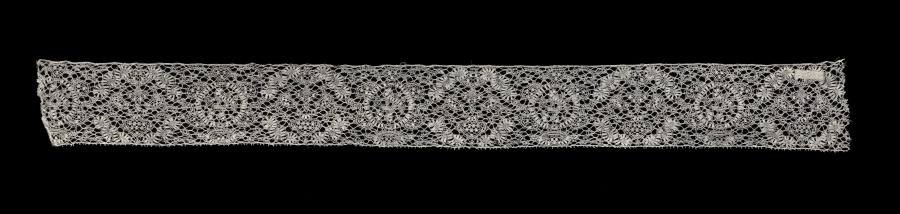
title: Lace Edging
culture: Belgium, Binche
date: 1700s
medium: Linen: bobbin lace with multiple square tallies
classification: Lace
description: The design of this piece of lace is similar to three other pieces of lace in CMA's collection--1945.86, 1945.87, and 1945.89.